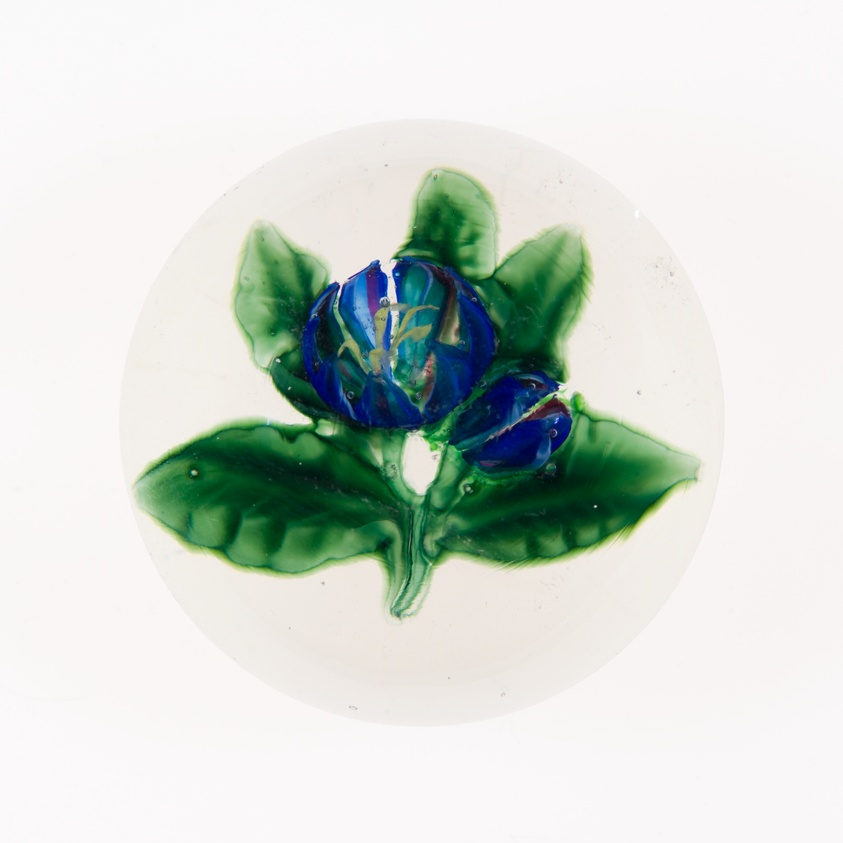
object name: Glass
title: Paperweight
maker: Clichy Glassworks (Cristalleries de Clichy); Clichy, France, 1837-1885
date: 19th century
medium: Glass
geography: France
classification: paperweight; glass